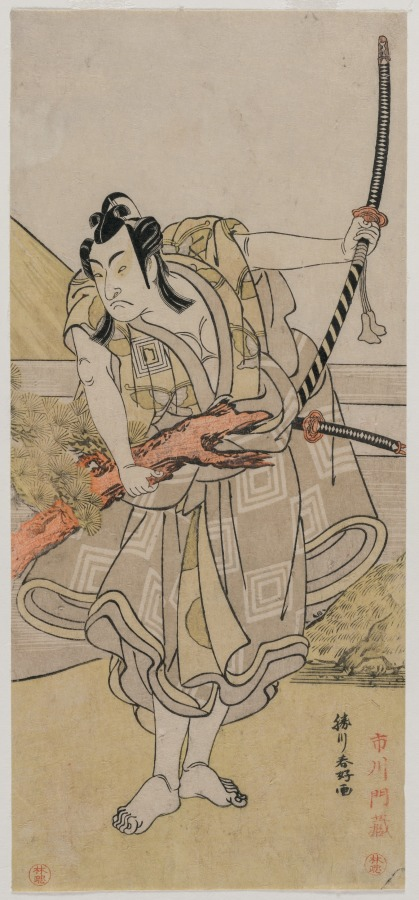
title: Ichikawa Monnosuke II as Soga no Gorō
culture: Japan, Edo period (1615–1868)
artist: Katsukawa Shunkō (Japanese, 1743–1812)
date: 1779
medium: color woodblock print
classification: Print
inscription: Signature: Katsukawa Shunko ga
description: Some Kabuki plays centered on the legend of the Soga brothers, Gorō and Jurō, who avenge their father’s murder before coming to their own demise. The setting is near Mount Fuji, part of which appears in the background. The print is likely from a diptych (a composition of two prints). The other print would have shown the rest of the mountain and Gorō’s retainer (a person retained by another to act in a military capacity), Asahina Saburō, tugging at the same pine bough as Gorō—a twist on scenes in which Saburō pulled Gorō’s armor to try to prevent him from protecting his brother.